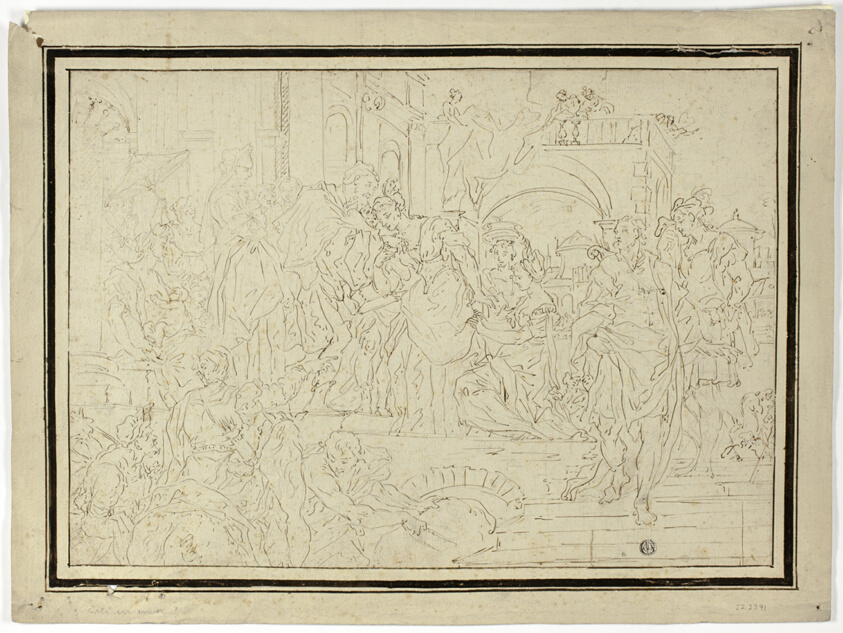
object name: Drawing and Watercolor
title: Ruler Receiving Lady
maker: Francesco Solimena or after; Italian, 1657-1747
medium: Pen and brown ink, over black chalk, on cream laid paper, laid down on cream laid paper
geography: Italy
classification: pen and ink drawings; drawings (visual works); prints and drawing